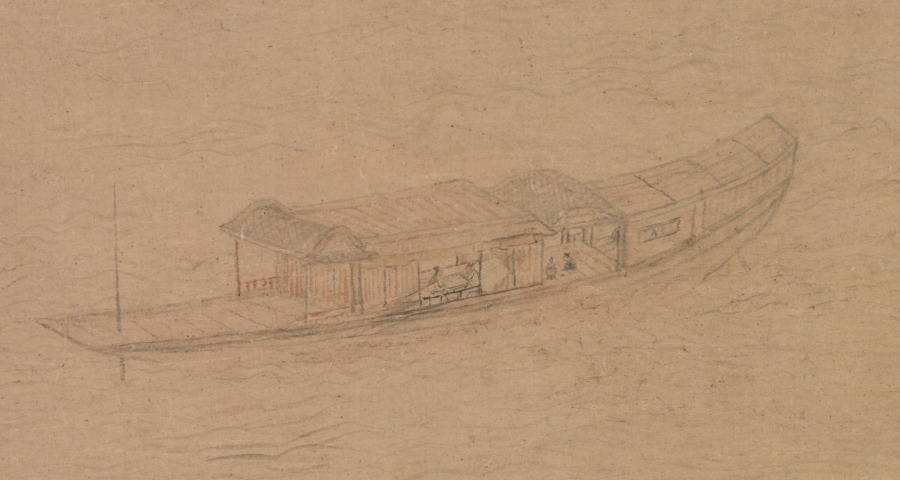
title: The Crossing of the Yangzi River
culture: China, Qing dynasty (1644-1911)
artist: Shang Rui (Chinese, 1634?-)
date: c. 1700–1720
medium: hanging scroll, ink and slight color on paper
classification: Painting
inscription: Colophons: One upper left inscription by the artist followed by two seals; one upper right inscription followed by two seals; three other seals, one in lower left